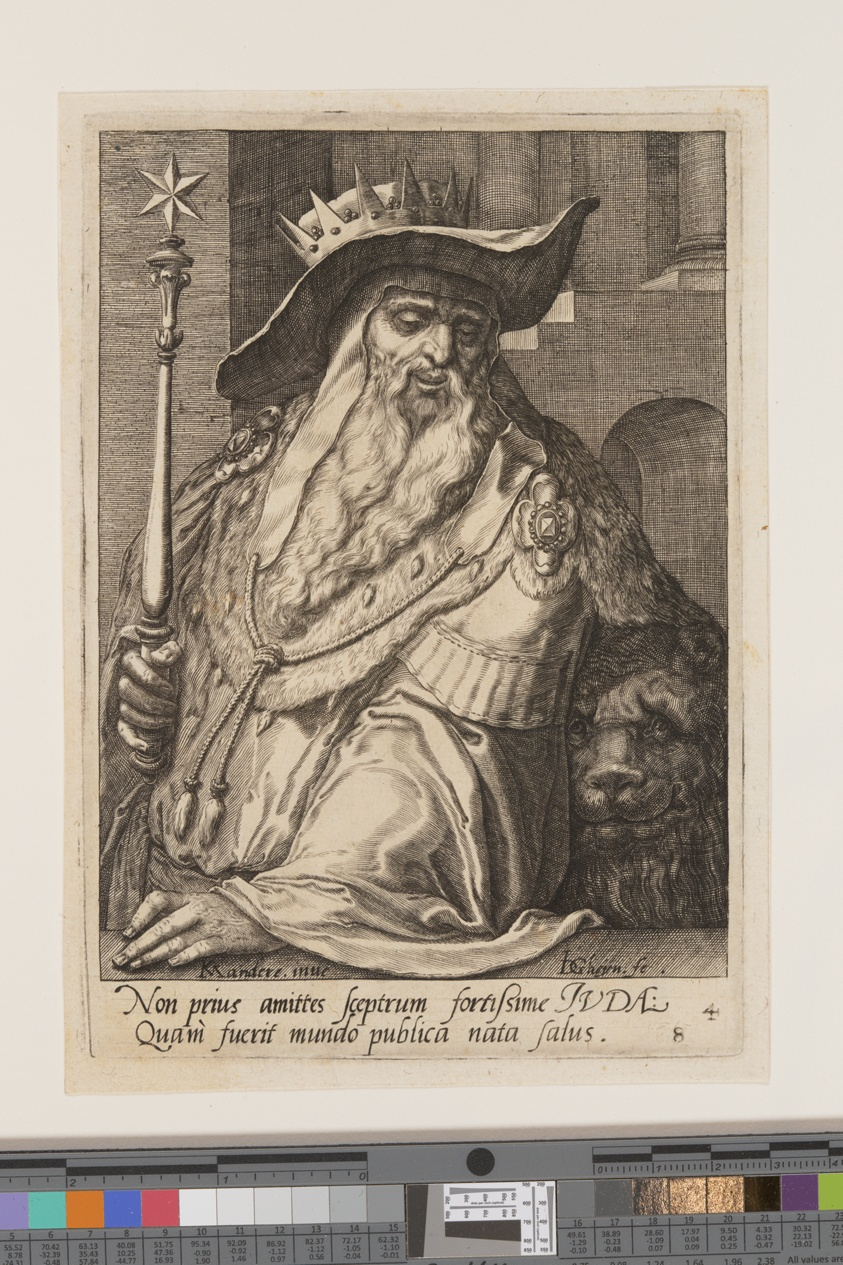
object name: Print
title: Judah, from The Twelve Sons of Jacob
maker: Jacques de Gheyn II (Dutch, 1565–1629); after Karel van Mander (Dutch, 1548–1606)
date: c. 1589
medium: Engraving on ivory laid paper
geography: Netherlands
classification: engraving; paper; print; prints and drawing